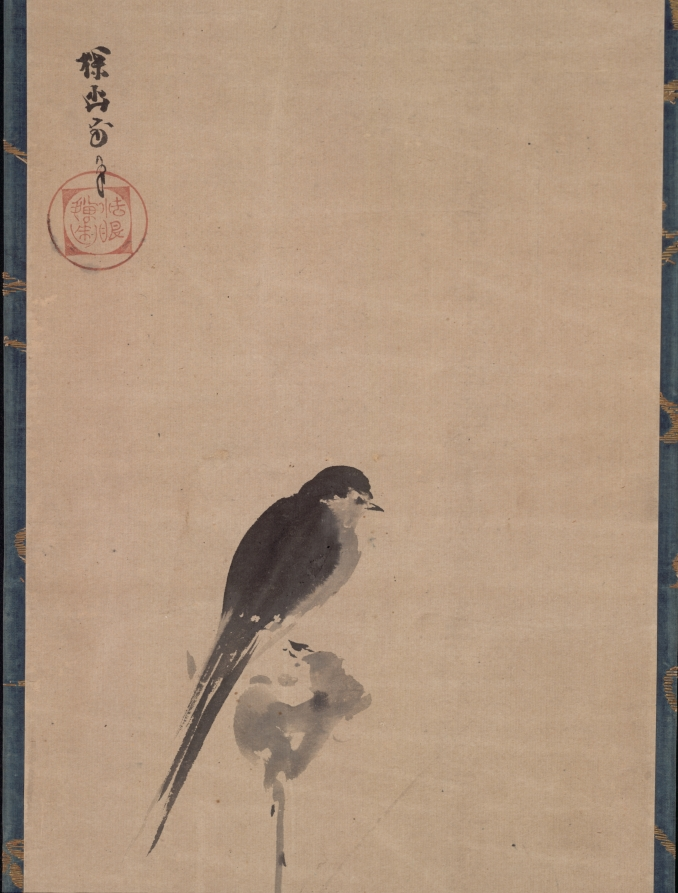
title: Bird on a Lotus Bud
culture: Japan, Edo period (1615–1868)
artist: Kano Tan’yū (Japanese, 1602–1674)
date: 1600s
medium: hanging scroll, ink on paper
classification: Painting